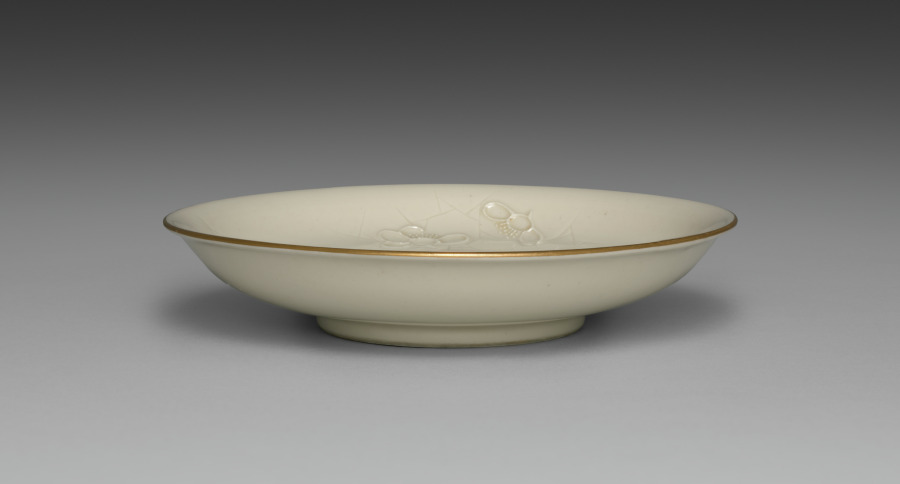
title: Medium-sized Dish from Dining Set with Plum Blossoms and Cracked-Ice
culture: Japan, Meiji period (1868–1912)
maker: Seifū Yohei II (Japanese, 1844–1878)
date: c. 1875–78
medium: Porcelain with molded designs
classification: Ceramic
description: Each item in this set has a delicate low-relief design of flowering plum branches over scattered, intersecting lines meant to resemble the cracked-ice surface of a frozen body of water and is signed on the base in gold pigment. While Yohei II produced many fine works in underglaze blue, like those produced by Kiyomizu Shichibei, he also made works in quite different styles later in his career, from the early 1870 s. In 1873, he was appointed purveyor to the Industrial Center of Kyoto Prefecture, a designation associated with Kyoto’s efforts to reach an international market through the port of Kobe; and from 1875 until his death, he was involved in national-level projects to present Japanese ceramics across the world. It was during this period that Yohei III was apprenticed to Yohei II, and it has been suggested that this set may in fact be an early example of Yohei III’s work, which he signed with his teacher’s name. Decorated with flowers resembling Japanese textile motifs, the set calls to mind the design of Yohei II’s pair of vases with plum blossoms in the Victoria and Albert Museum. Here, the elaborate trees created for a formal public exhibition setting have been translated into the approachable blossoms of the genteel domestic environment. While the designs are consistent across the pieces, each raised flower petal and pistil and each incised line in the ice was done by hand, so the cups, bowls, and dishes are similar yet unique. The bottoms of two boxes once identified the set’s owner, but the information has been deliberately obscured with black ink. However, inscriptions still visible appear to indicate two occasions, once at the end of July 1886 , and once again in June 1916 , when parts of the set were requested from Hokura in Niigata Prefecture. The location corresponds to a neighborhood in the present-day city of Jōetsu. The surname Tsuji 辻 also appears on a paper tag affixed to one of the box cloths. Future research may possibly reveal more about their provenance. A vase by Yohei III in a private collection combines the formal grandeur of the Yohei II vases in the Victoria and Albert Museum with the gentler design of this dining set, placing flowering plum trees against soft, scalloped-edge clouds resembling those in golden screens.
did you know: The dining wares have a creamy white coloration that the four boxes containing them identify as Korean in style.